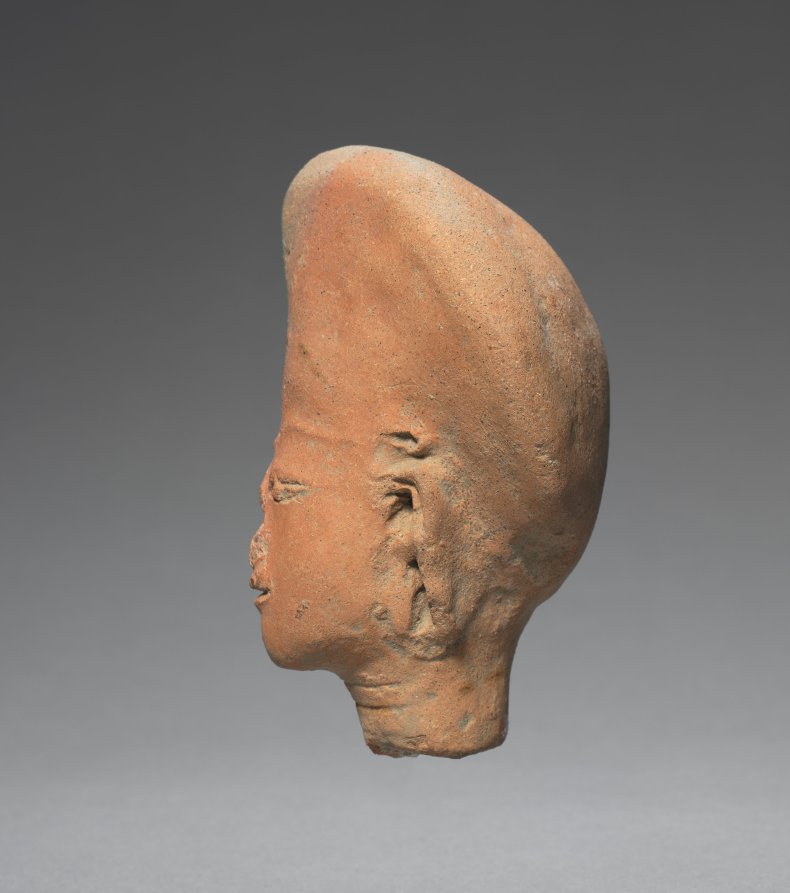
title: Head of a Woman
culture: Java, Majapahit period (1294–1478)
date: 1300s–1400s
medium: terracotta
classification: Sculpture